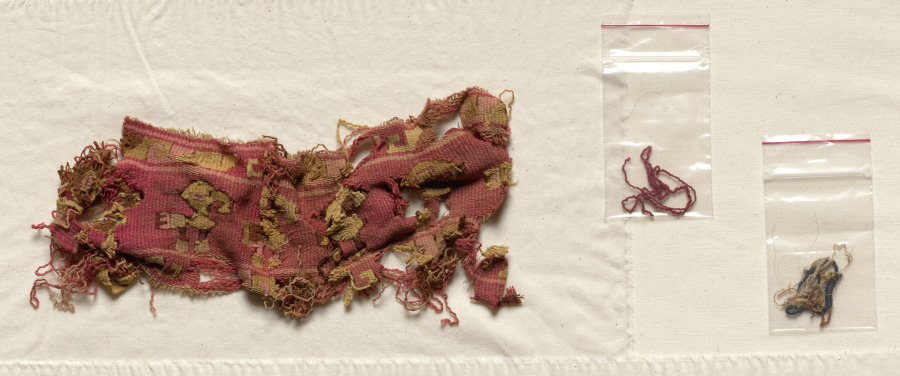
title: Textile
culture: Peru, Central Coast, Chancay, 12th-15th century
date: c. 1100–1400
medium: tapestry weave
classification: Textile